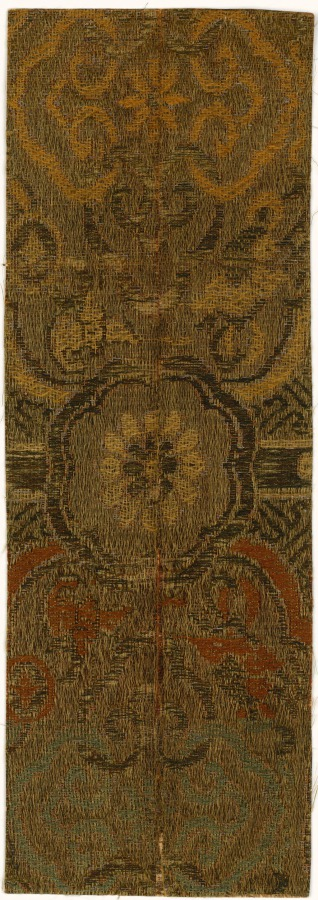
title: Fragment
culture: China, 19th century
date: 1800s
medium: silk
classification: Textile